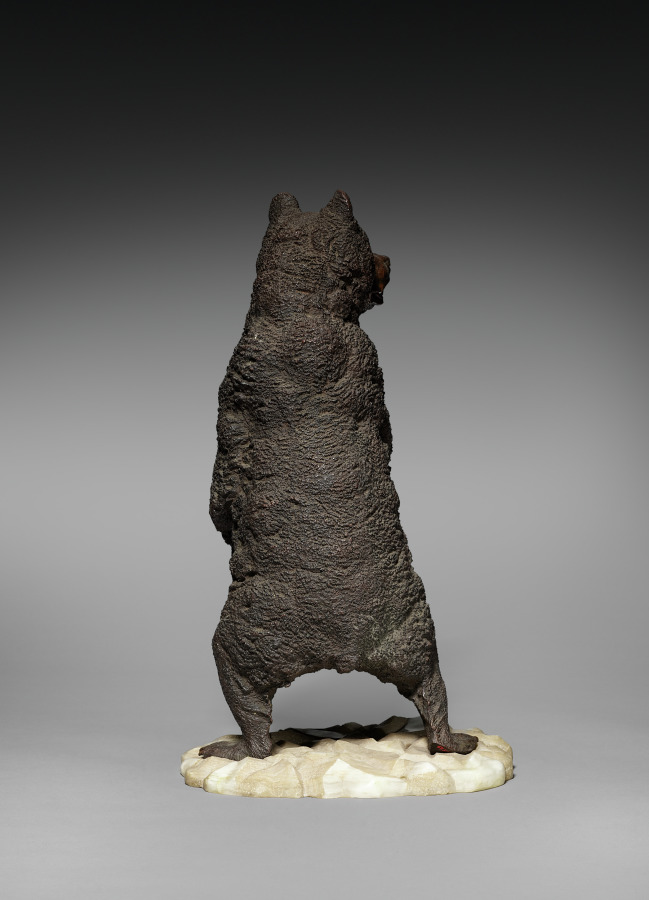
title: Bear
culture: Japan, Meiji period (1868–1912) to Shōwa period (1926–89)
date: c. 1900–1947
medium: bronze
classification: Sculpture